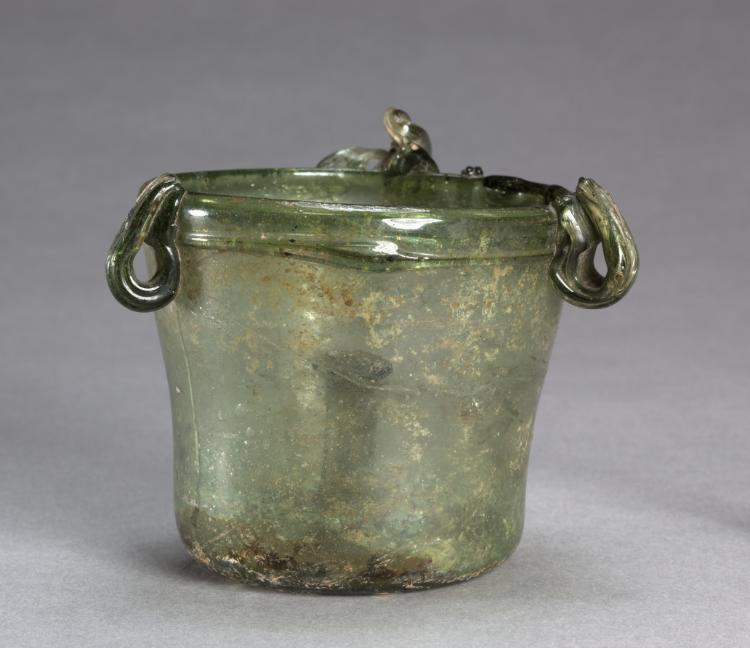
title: Lamp with Wickholder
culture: Eastern Mediterranean, Roman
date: 300–600 CE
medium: glass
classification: Glass